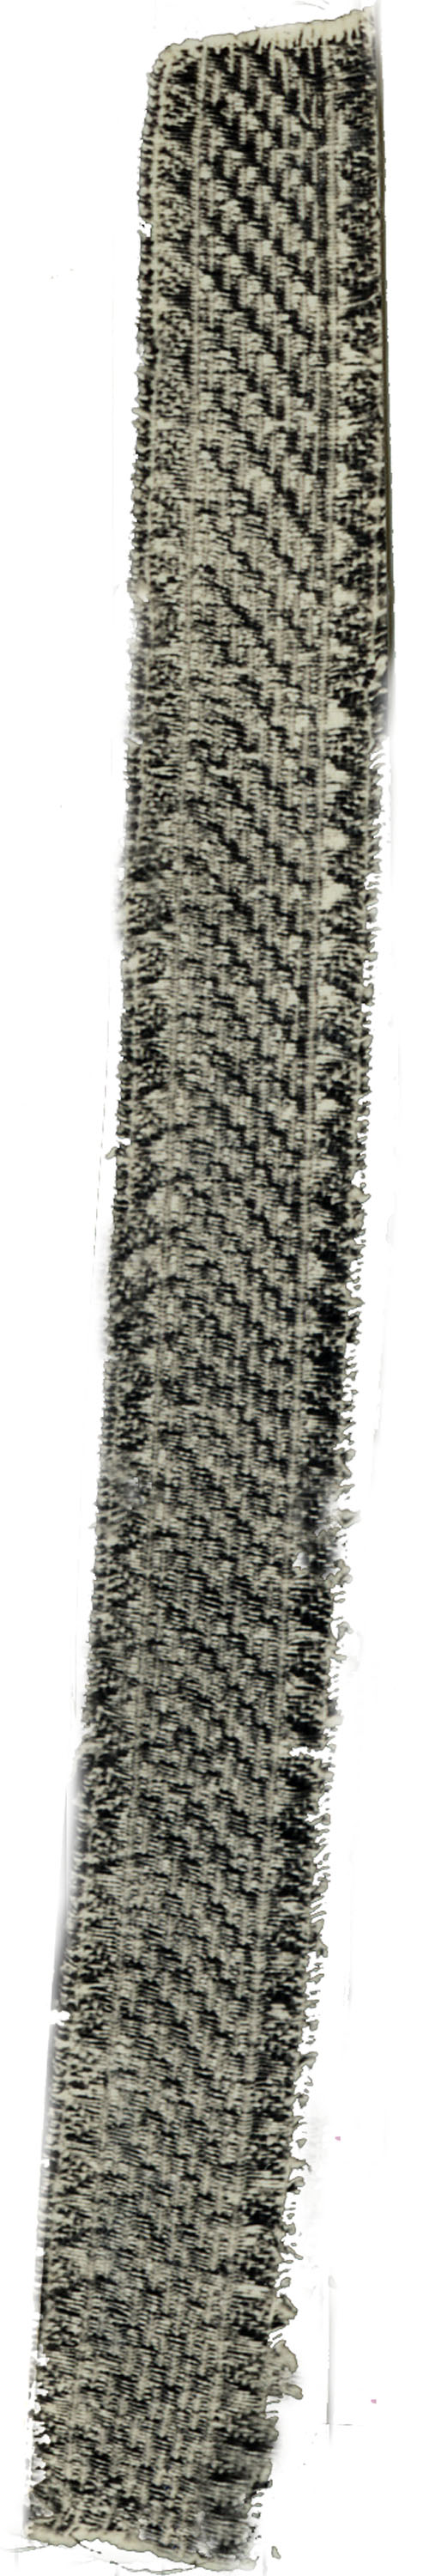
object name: Textile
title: Galloon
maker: Italy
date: 18th century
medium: linen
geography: Italy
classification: textile; weaving